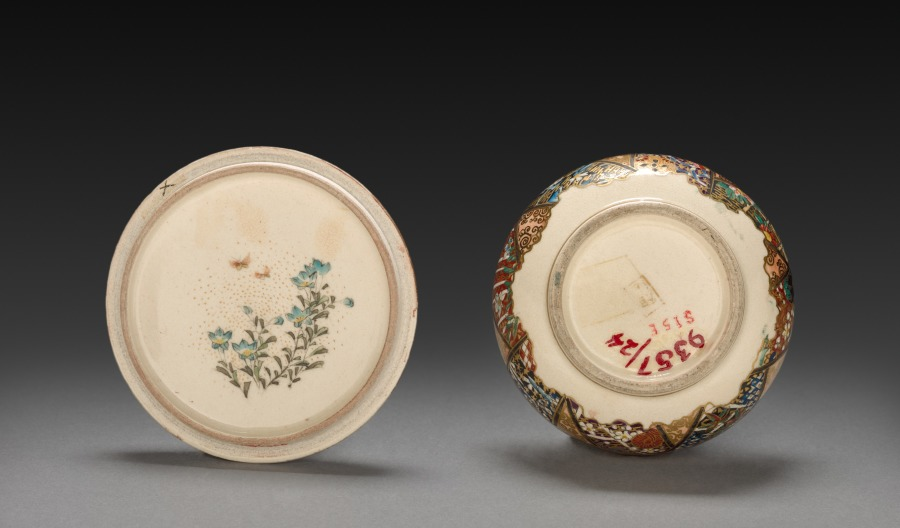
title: Covered Dish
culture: Japan, Meiji period (1868–1912)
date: early 1900s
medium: porcelain with overglaze color enamel and gold (Satsuma ware)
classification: Ceramic